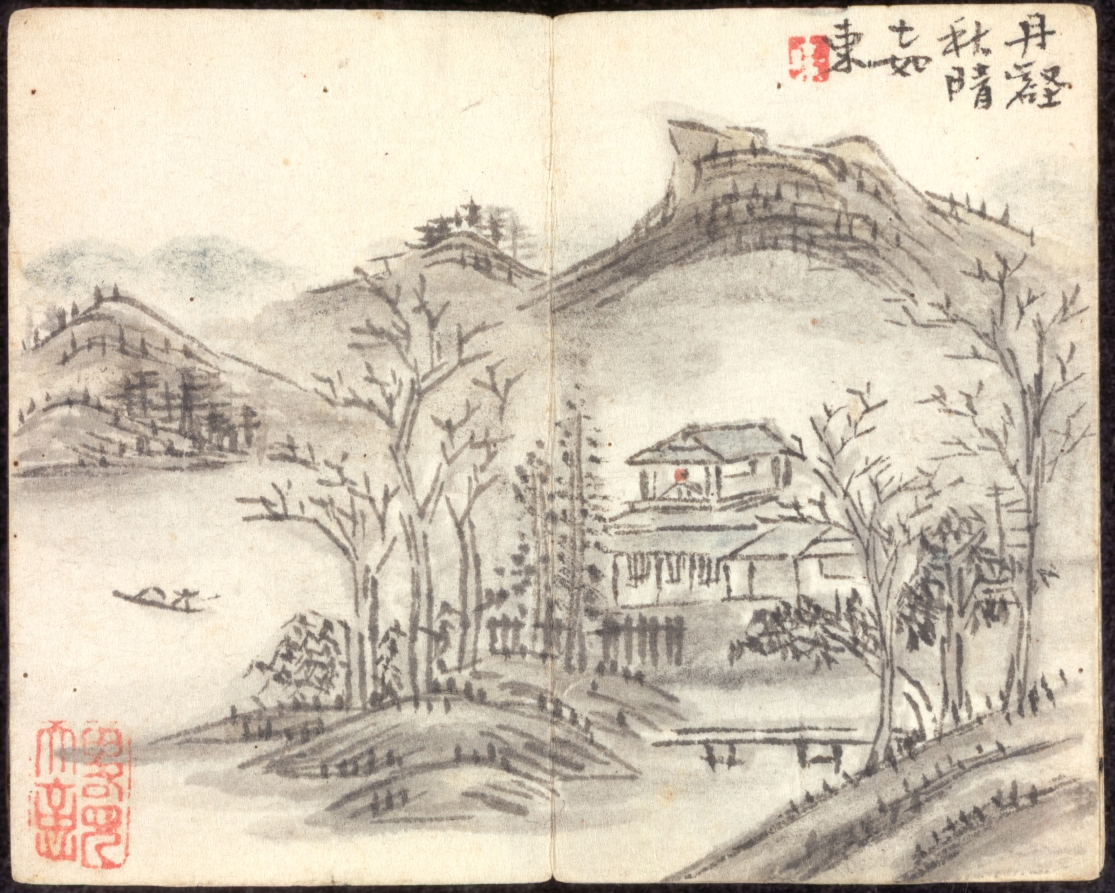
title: Miniature Album with Figures and Landscape (Landscape with Hill, House, Boat and Bridge)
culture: China, Qing dynasty (1644–1911), Qianlong reign (1736–95)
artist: Zeng Yandong (Chinese, c. 1751–1827)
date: 1822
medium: album leaf, ink and color on paper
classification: Painting